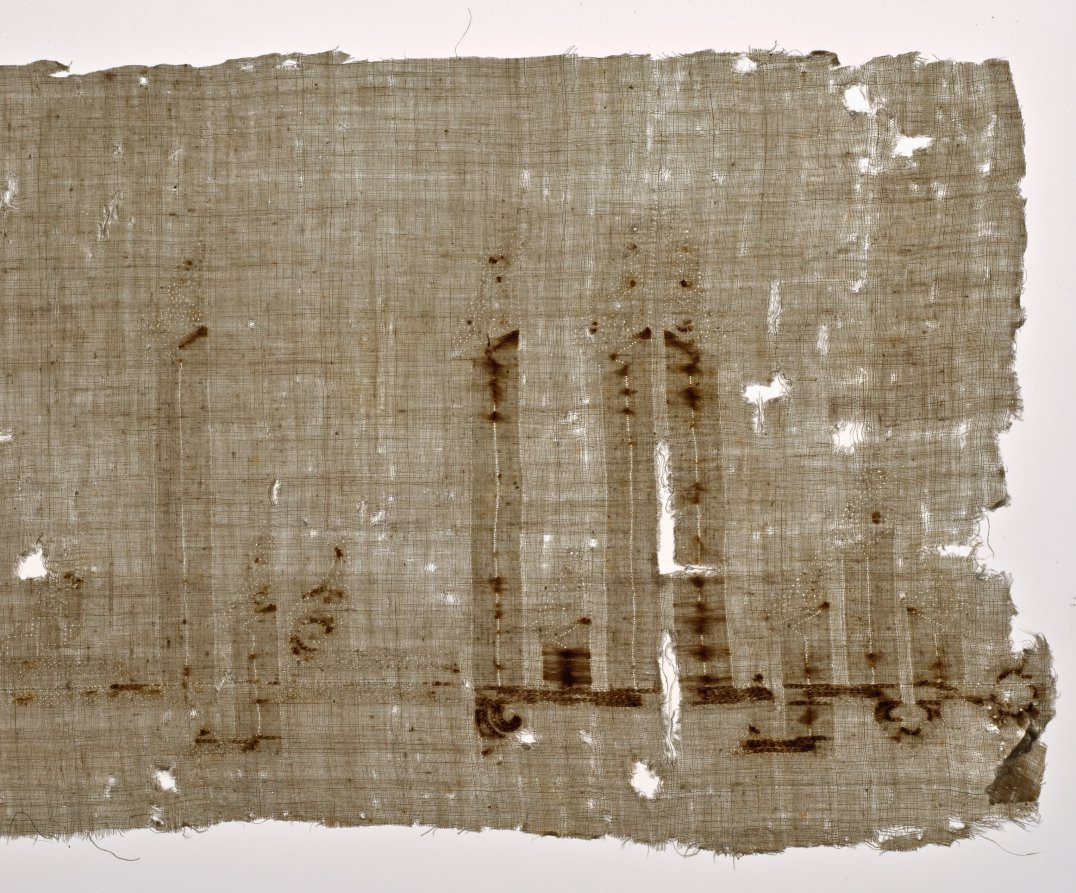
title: Tiraz of Caliph ‘Abd al-Rahman III, from the reliquary of Santa Librada, Cathedral of Seqüenza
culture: Spain, Cordoba, Spanish Umayyad period (756–1031)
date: 941–42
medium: Linen; silk: embroidery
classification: Embroidery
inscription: only the traces of a very large-scale elaborately foliated Kufic inscription preserved, largely in the form of needle holes but with a few small areas where the stitches are intact. This is approximately the second half of the original full inscription, which measured well over two meters long; the bulk of the original textile with the first half of the inscription was formerly preserved in the Cathedral of Siquenza. As preserved on the two fragments, the full inscription reads: "[Commander of the Be]lievers al-Masir li-Din al-Muslimin, may God support him! That which was made through the agency of Durri, his servant, in the year thirty and three hundred."